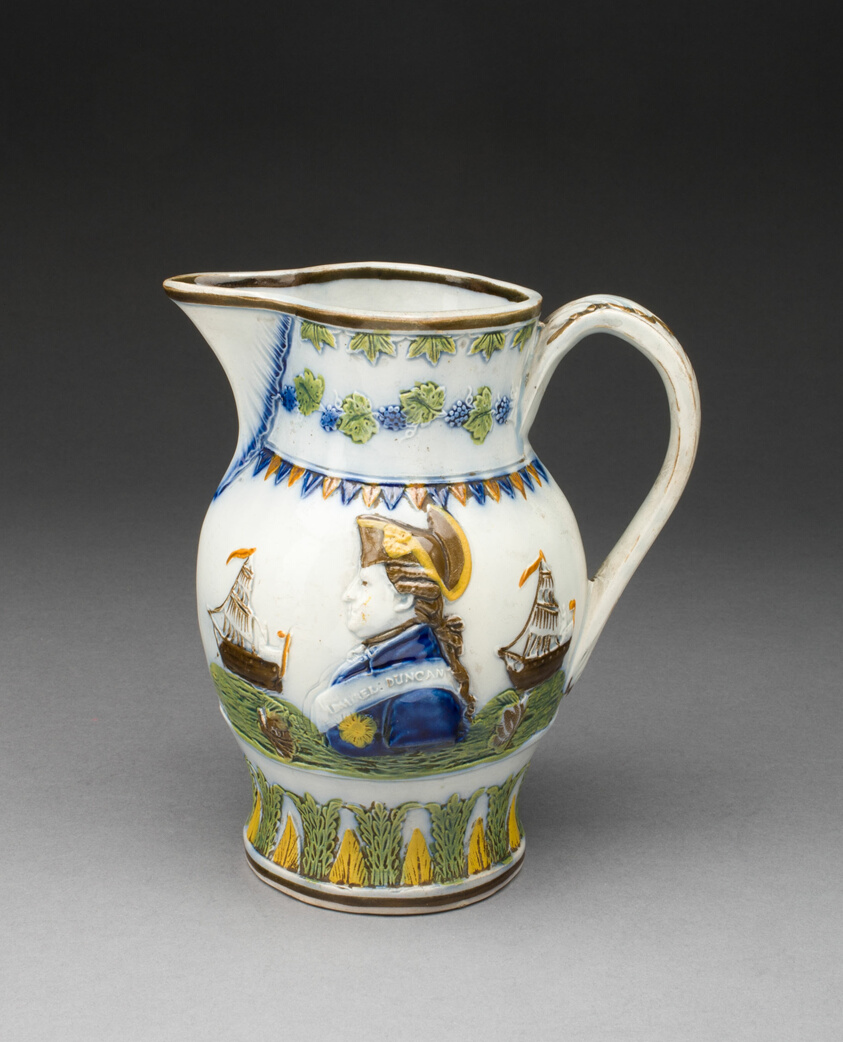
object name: Ceramics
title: Jug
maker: England, Staffordshire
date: c. 1797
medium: Lead-glazed earthenware (prattware)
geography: Staffordshire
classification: earthenware; european decorative arts; ceramics; lead-glazed earthenware